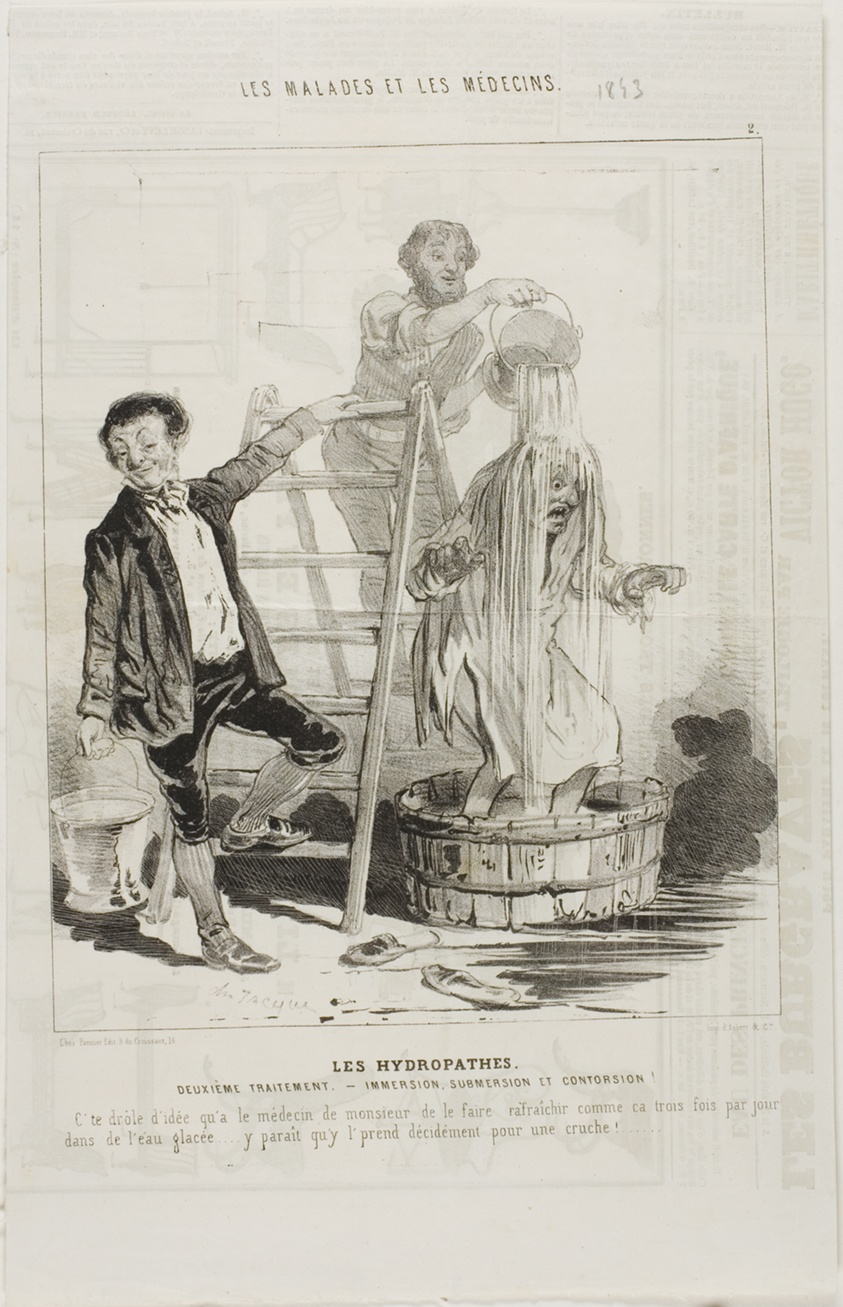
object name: Print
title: The Hydropaths: Second Treatment (plate 2)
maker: Charles Émile Jacque (French, 1813-1894)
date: 1843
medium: Lithograph in black on ivory wove paper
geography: France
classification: lithograph; print; prints and drawing